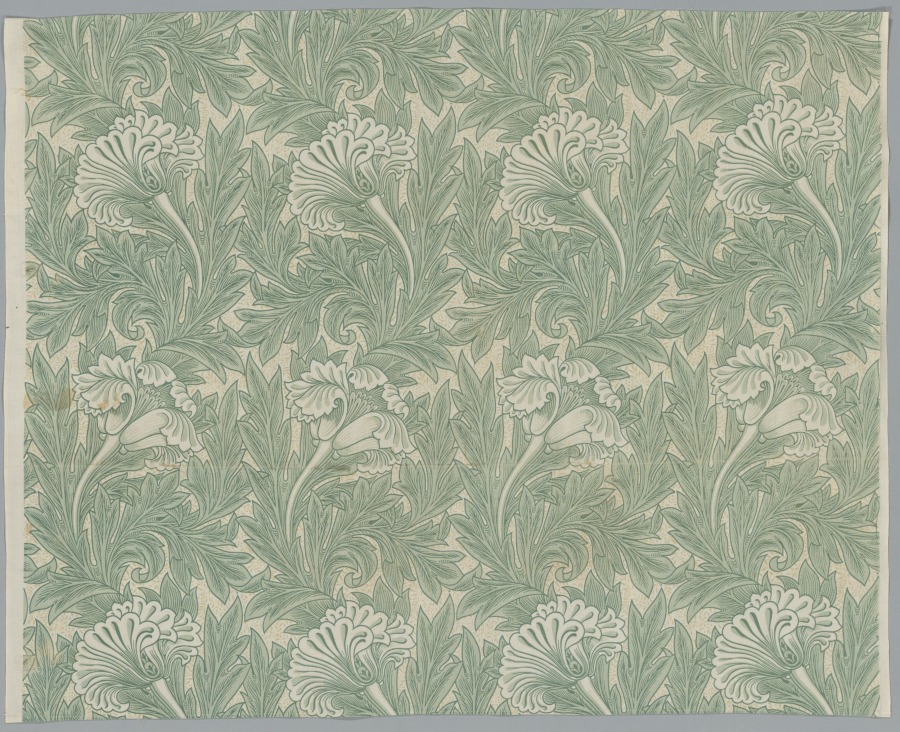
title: Tulip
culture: England, 19th century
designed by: William Morris (British, 1834–1896)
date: 1875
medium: roller printed cotton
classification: Textile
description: William Morris was a designer, craftsman, poet, novelist, businessman, and social activist. A doctor attributed his cause of death at age 62 to “simply being William Morris, and having done more work than most ten men.” His decorative arts firm Morris, Marshall, Faulkner & Co., known simply as Morris & Co. after 1875, designed and sold household furnishings that were sought after for their elegant, colorful patterns and high-quality materials. Morris insisted on producing goods under fair labor conditions, which set him apart from many Victorian manufacturers for whom industrialism meant imposing grueling hours for low wages in dangerous factories. During an age when rooms were stuffed with mass-produced objects and teeming with ornament, Morris challenged consumers to embrace harmony and restraint in decoration: “Have nothing in your houses that you do not know to be useful or believe to be beautiful.” Textiles were among the most profitable of the company’s merchandise and included embroidery, printed cotton, woven fabrics, tapestries, and carpets. Morris’s designs and working philosophy combined a vast knowledge of the past with a vision for the future. His final labor of love, the Kelmscott Press, was founded in 1890 and produced beautiful books with ornaments and typefaces that Morris designed. They were often illustrated by his friend Edward Burne-Jones and other artists. Morris wanted readers to enjoy the tactile experience of holding and reading from these volumes. Printed on high-quality linen paper, many are bound in vellum (animal skin). Their designs have much in common with books printed in the earliest years of the printing press.